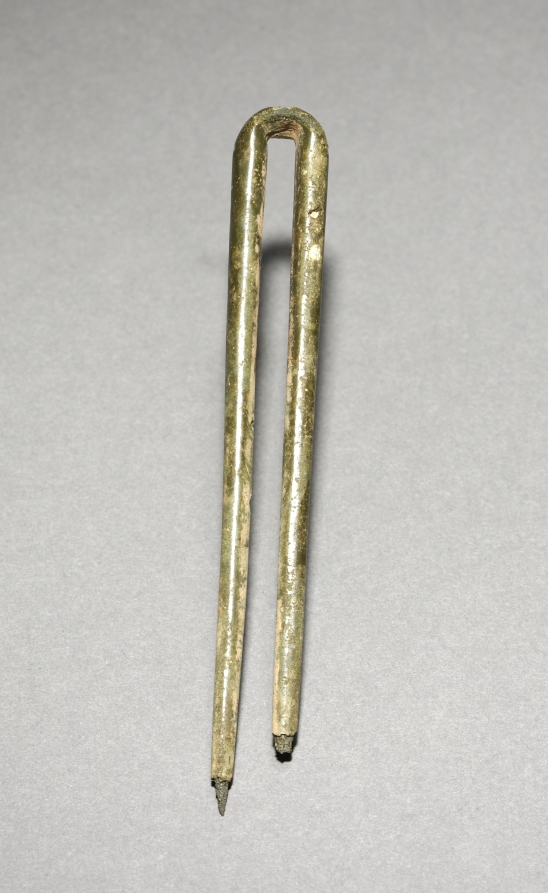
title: Topknot Pin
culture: Korea, Goryeo dynasty (918–1392)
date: 918–1392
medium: bronze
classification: Metalwork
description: Metallurgy advanced remarkably in the Goryeo period (918-1392), explaining why a large quantity of sophisticated metal artifacts were used not only as daily accessories but also as burial goods. Men put their hair in a knot at the top of their heads. To keep their long hair from falling, a bronze pin such as this one was used.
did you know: This bronze hairpin was for a man to fix his topknot.